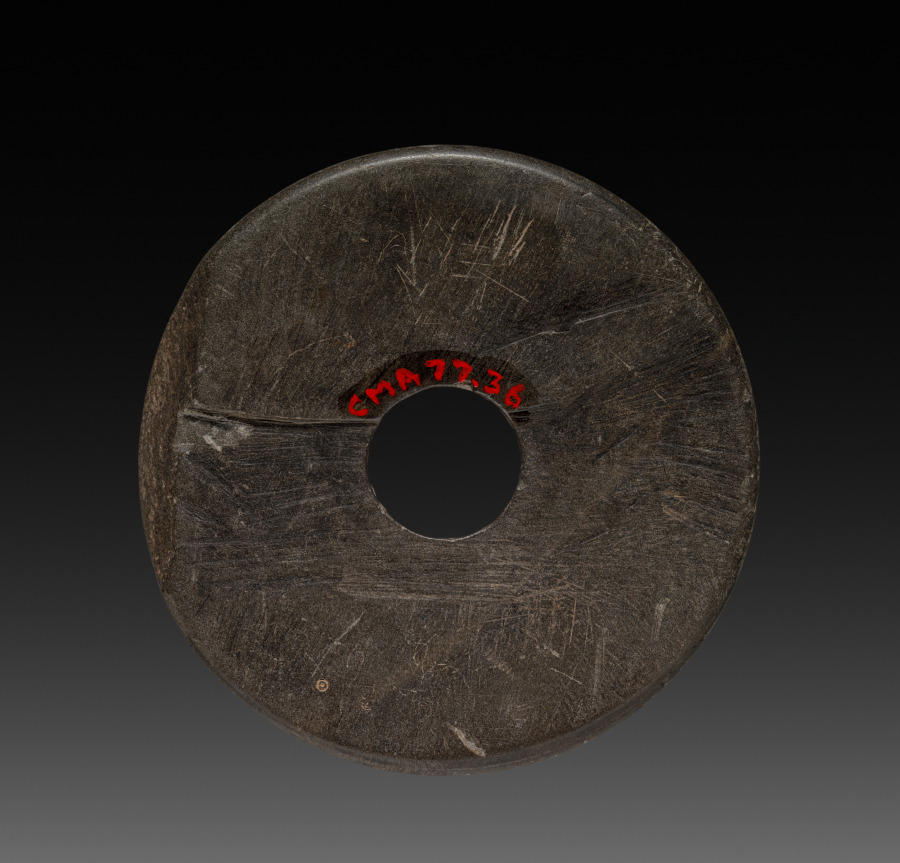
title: Ringstone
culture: India, Maurya period (322–185 BCE)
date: 200s BCE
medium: steatite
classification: Sculpture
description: Ringstones are among the earliest works of art to be created in stone during India's historical period. This example is finely carved with detailed images of affectionate couples and palm trees, running animals, and geometric motifs in concentric circles. The function of ringstones remains uncertain, since none of the surviving examples is inscribed or explained in a text.